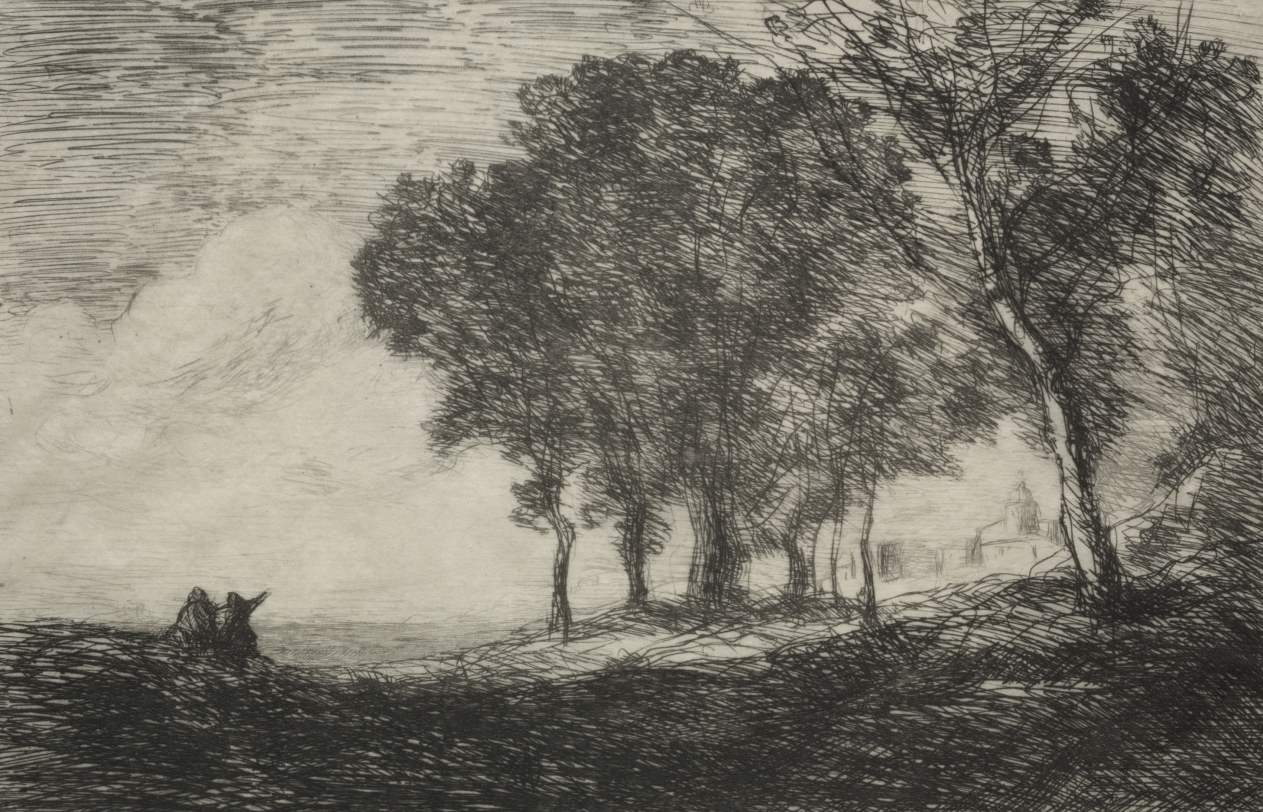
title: Italian Landscape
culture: France, 19th century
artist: Jean Baptiste Camille Corot (French, 1796–1875)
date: c. 1865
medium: etching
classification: Print